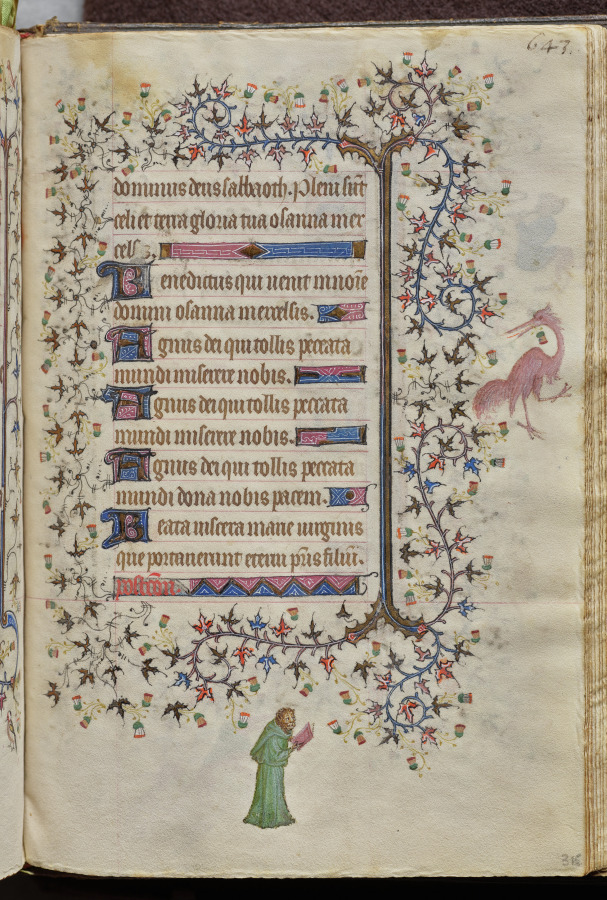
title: Hours of Charles the Noble, King of Navarre (1361-1425), fol. 316r, Text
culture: France, Paris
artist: Master of the Brussels Initials and Associates (French)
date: c. 1405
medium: ink, tempera, and gold on vellum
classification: Bound Volume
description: This precious volume was obviously highly prized by its owner, the French-born King of Navarre, who had his coat of arms painted on no less than twenty folios. Rather than directly commissioning this manuscript from a specific workshop, it seems that Charles the Noble acquired his book of hours -- perhaps ready-made for the luxury market -- while on a trip to Paris in 1404-05. A collaborative effort, six painting styles are evidenced within the pages of this codex, those of two Italians, two Frenchmen, and two Netherlanders. The painter who was responsible for the planning and decoration of the book, and who produced seventeen of the large miniatures, was a Bolognese artist known as the Master of the Brussels Initials. His principal assistant, responsible for most of the borders, was a Florentine who signed his name "Zecho" da Firenze on folio 208 verso.